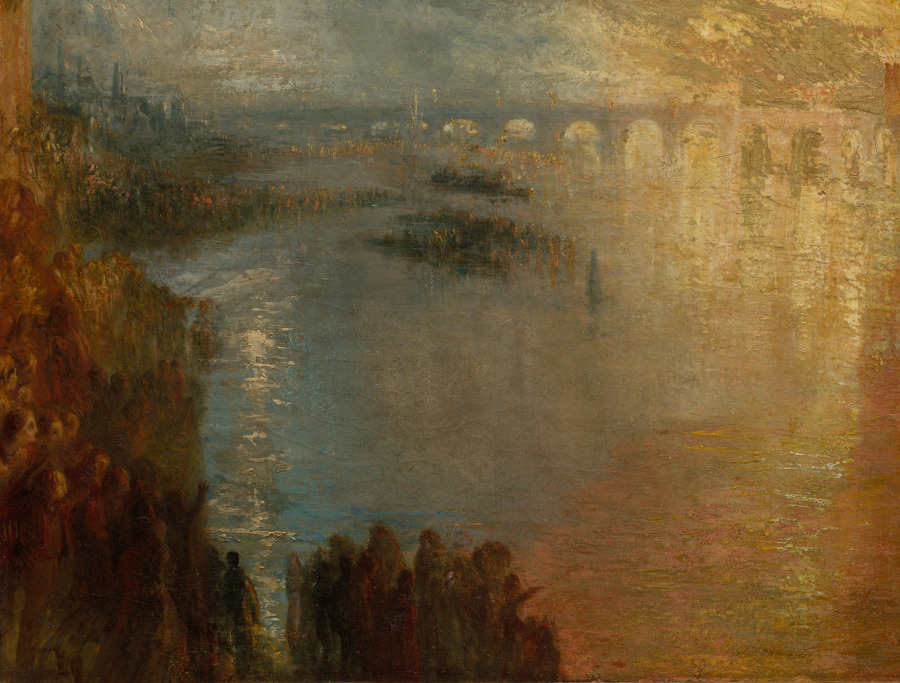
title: The Burning of the Houses of Lords and Commons, 16 October 1834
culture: England, 19th century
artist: Joseph Mallord William Turner (British, 1775–1851)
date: 1835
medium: oil on canvas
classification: Painting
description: Fire consumed London’s famous Houses of Parliament on the night of October 16, 1834, and people gathered along the banks of the river Thames to gaze in awe at the horrifying spectacle. Initially, a low tide made it difficult to pump water to land and hampered steamers towing firefighting equipment along the river. The blaze burned uncontrollably for hours. J. M. W. Turner records the struggle as the boats in the lower-right corner head toward the flames. Although Turner based the painting on an actual event, he magnified the height of the flames, using the disaster as the starting point to express man’s helplessness when confronted with the destructive powers of nature. Brilliant swathes of color and variable atmospheric effects border on abstraction.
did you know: Turner painted two versions of this event. Cleveland's painting views the fire downriver, from the southeast bank of the Thames, while the second version at the Philadelphia Museum of Art views the fire from directly across Westminster Bridge.